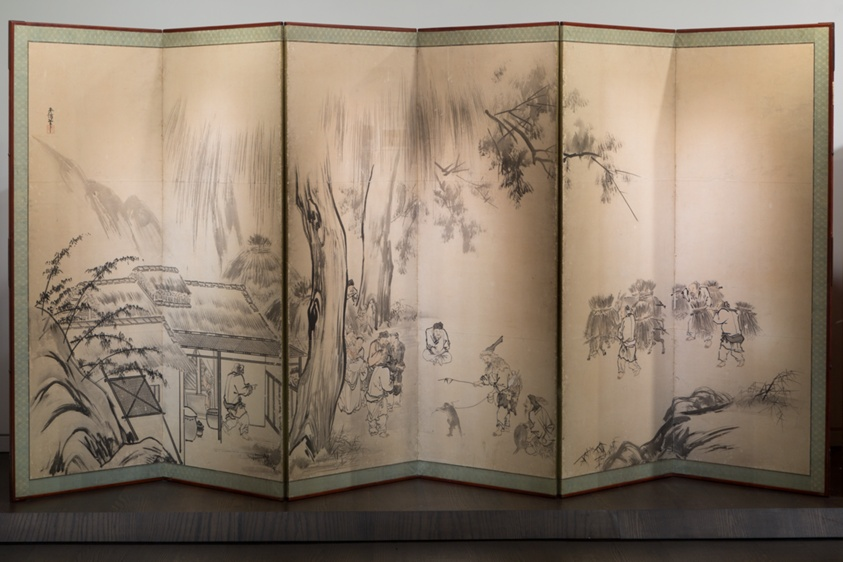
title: Monkey Trainers and Scenes of Chinese Life (耕作図屏風)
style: edo (japanese period), Japanism, East Asian, asian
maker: Kano Yasunobu (狩野安信); Japanese, 1613–1685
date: Edo period (1615–1868), 17th century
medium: Ink and light colors on paper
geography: Japan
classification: screen; painting; asian art